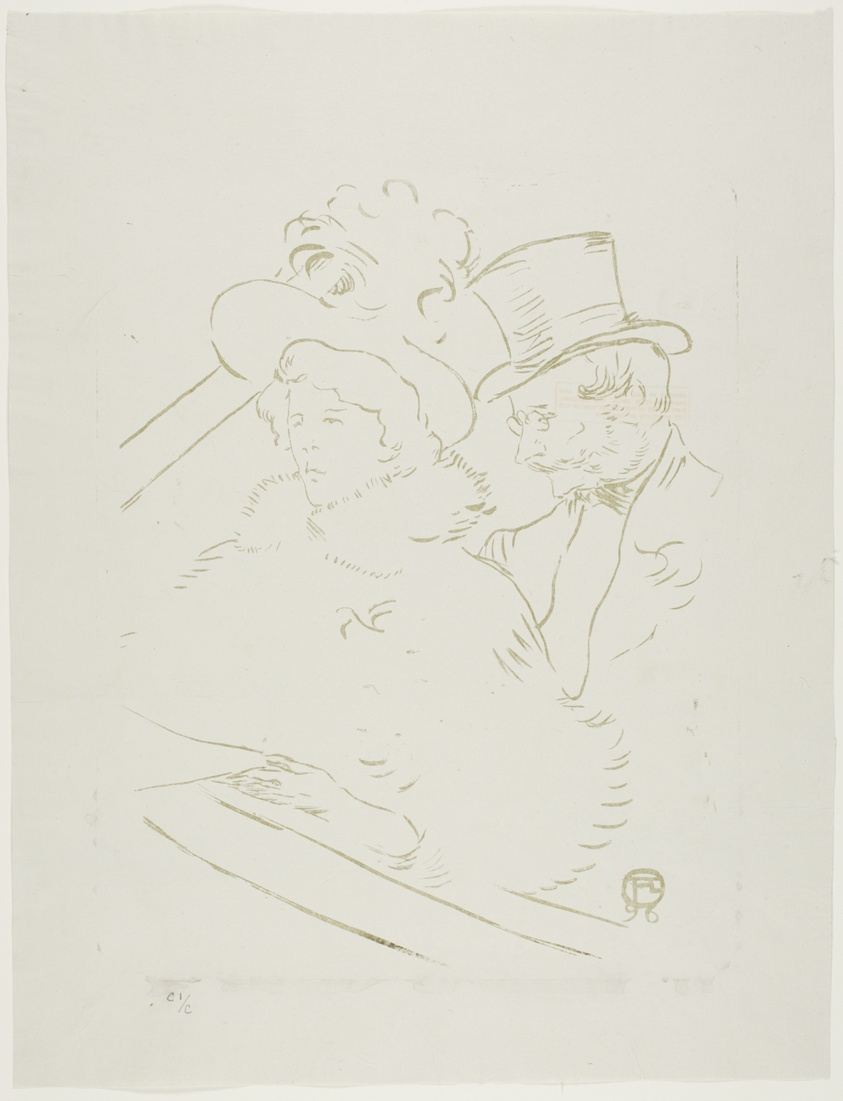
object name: Print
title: At the Concert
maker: Henri de Toulouse-Lautrec (French, 1864-1901)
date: 1896, printed 1946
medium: Zincograph in brownish olive-green on grayish-ivory laid chine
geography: France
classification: zincograph; print; prints and drawing